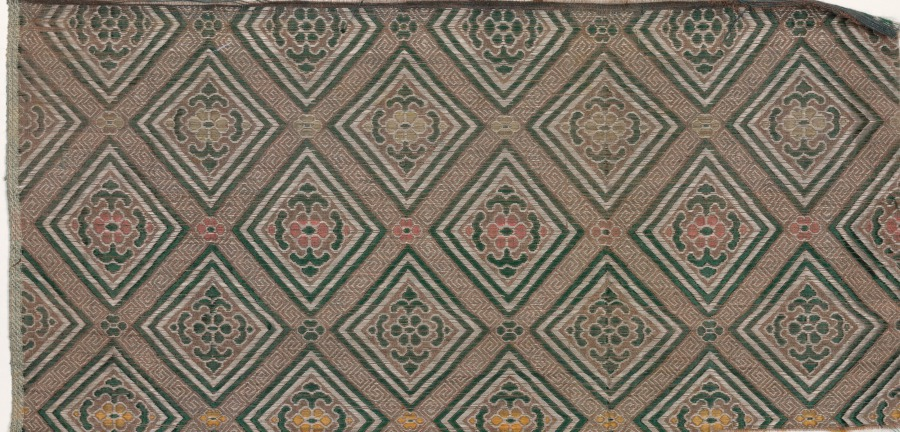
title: Textile Fragment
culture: Japan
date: 1800s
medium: silk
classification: Textile